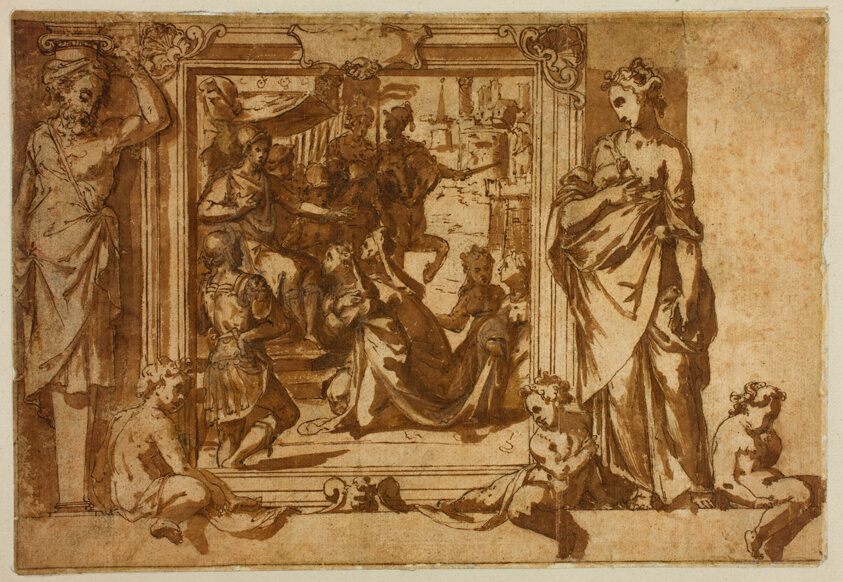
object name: Drawing and Watercolor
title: Woman Kneeling Before a Ruler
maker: Federico Zuccaro, circle of; Italian, c.1542-1609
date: 1566–67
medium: Pen and brown ink, with brush and brown wash, with touches of thin white gouache, on tan laid paper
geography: Italy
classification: pen and ink drawings; drawings (visual works); prints and drawing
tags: women, people, prints and drawings